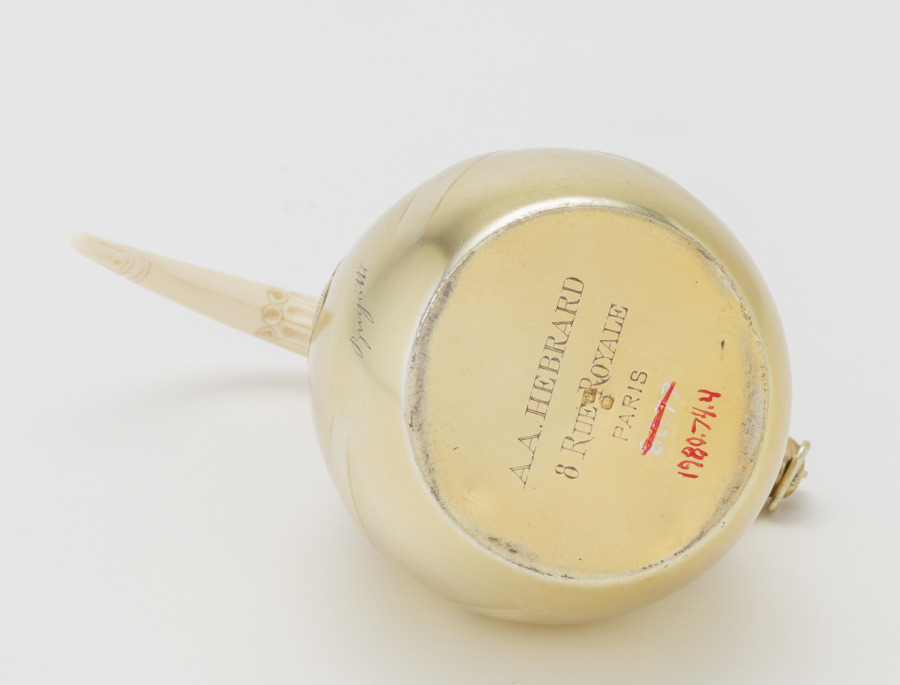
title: Tea Pot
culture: France, Paris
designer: Carlo Bugatti (Italian, 1856–1940)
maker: Adrien-Aurélien Hebrard (French, 1866–1937)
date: c. 1907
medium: Gilt silver and ivory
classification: Silver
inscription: Made by A. A. Hebrard Firm, Paris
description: This tea and coffee service, salver, and table, together with some now missing cups, were all designed by Carlo Bugatti as an ensemble and presented at the 1902 exposition devoted to decorative arts in Turin, Italy. The set was probably acquired from Bugatti's 1907 exhibition at the Galerie Hébrard in Paris by a wealthy South African widow, Anna Blake, who was living there at the time. Some of the animal and insect motifs suggest mythical beasts or the fossils of prehistoric animals. When Mrs. Blake returned to Cape Town, she took these and other pieces designed by Bugatti with her, and they remained in South Africa throughout her lifetime.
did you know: This tea pot is part of a tea and coffee service designed by Carlo Bugatti.